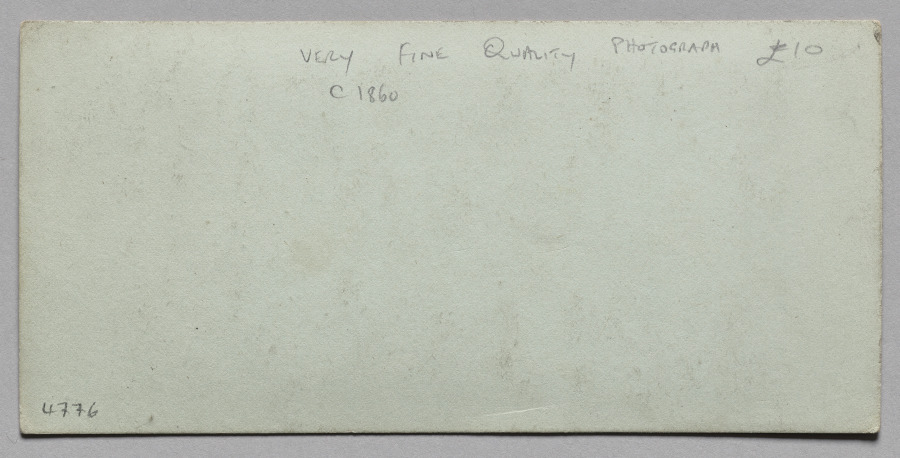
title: Temple Tank, Tamil Nadu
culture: Unknown British photographer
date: c. 1860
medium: stereoscopic albumen print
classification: Photograph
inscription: Written in pencil on verso: “A superb Indian stereocard £12/c. 1860/4775”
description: The photographer has not only shown us this Hindu temple from the southern Indian state of Tamil Nadu, but also one aspect of how people worshiped there: the ritual bath. He placed the temple’s tank in the foreground, with ghats (steps leading into the water), bathers, and a temple chariot for the procession of bronzes during festivals occupying the middle ground. In the background is a high gopura, a gateway that marks the entry into the temple’s grounds. When seen through a stereo viewer, the two images—each taken from a slightly different angle—create the illusion of a three-dimensional scene.